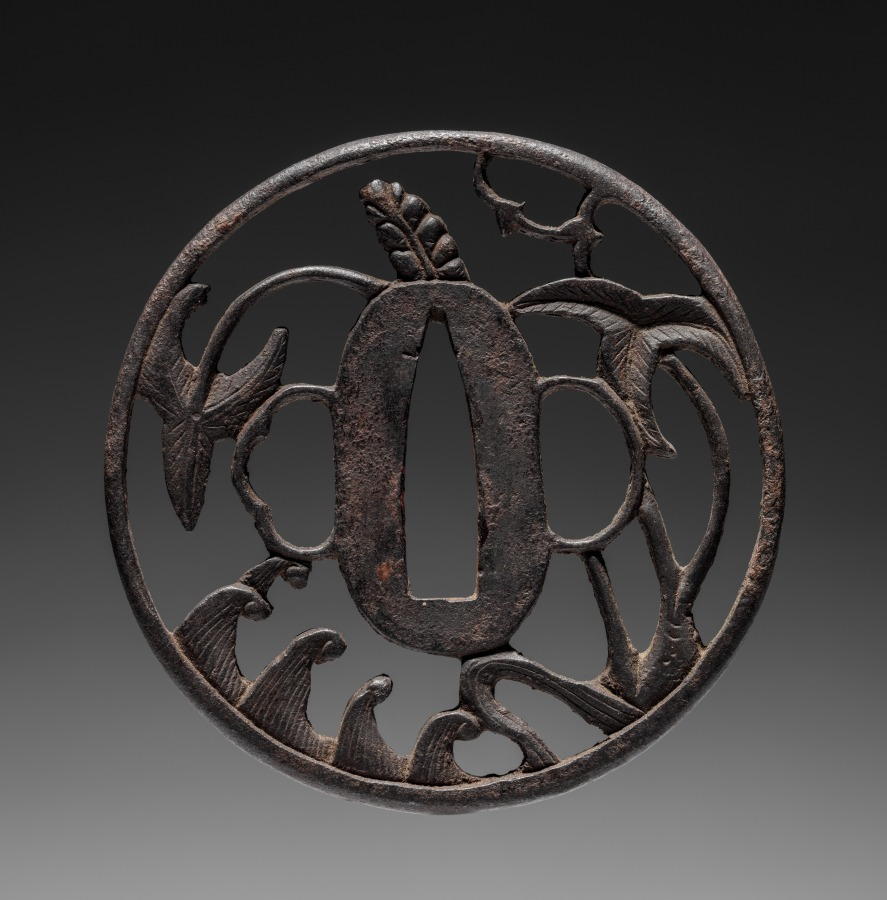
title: Sword Guard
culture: Japan, Edo period (1615–1868)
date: c. 1800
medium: iron (Choshu type)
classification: Arms and Armor